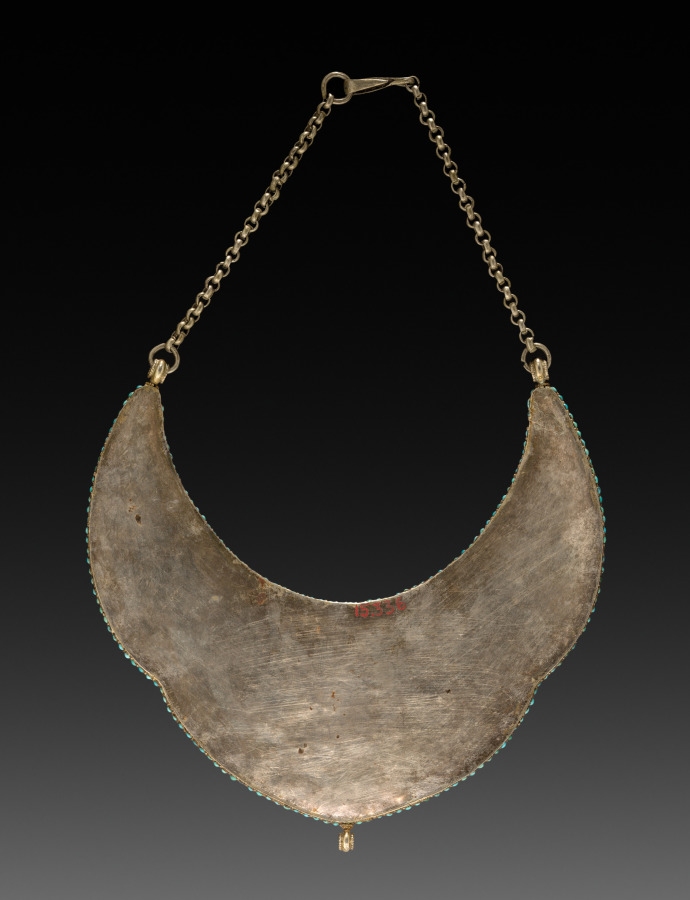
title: Gorget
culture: Tibet, 18th century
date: 1700s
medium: silver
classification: Jewelry